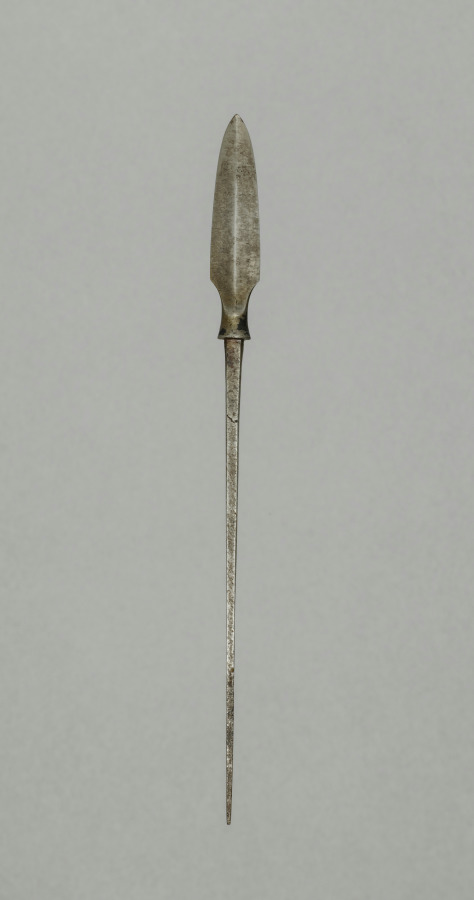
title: Arrow Point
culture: Japan, Edo period (1615–1868)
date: 1700s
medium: steel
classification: Arms and Armor